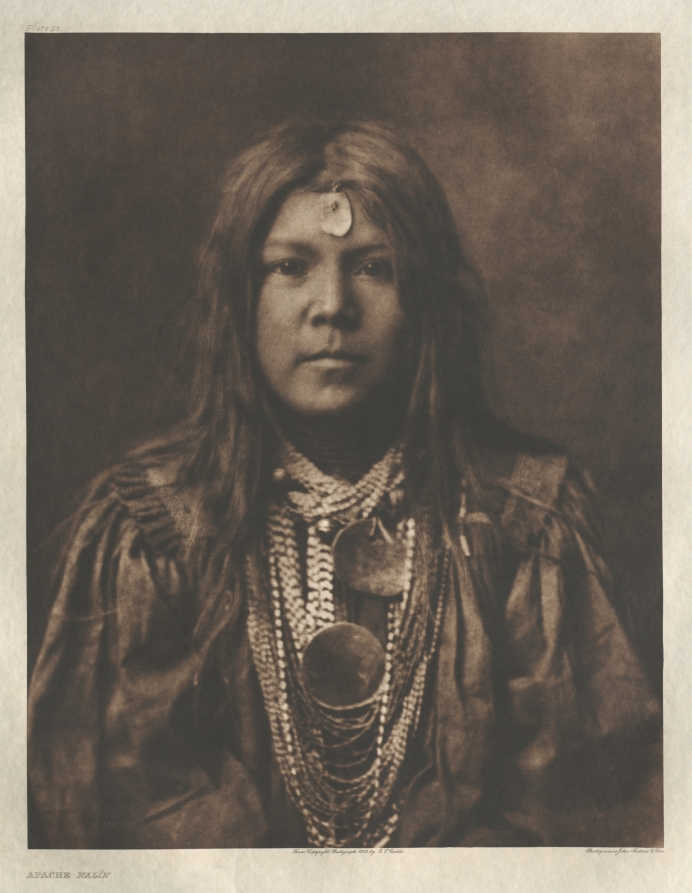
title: Portfolio I, Plate 15: Apache Nalin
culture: America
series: The North American Indian: being a series of Portfolios picturing and describing the Indians of the United States, the Dominion of Canada, and Alaska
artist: Edward S. Curtis (American, 1868–1952)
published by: The University Press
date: 1903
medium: photogravure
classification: Portfolio